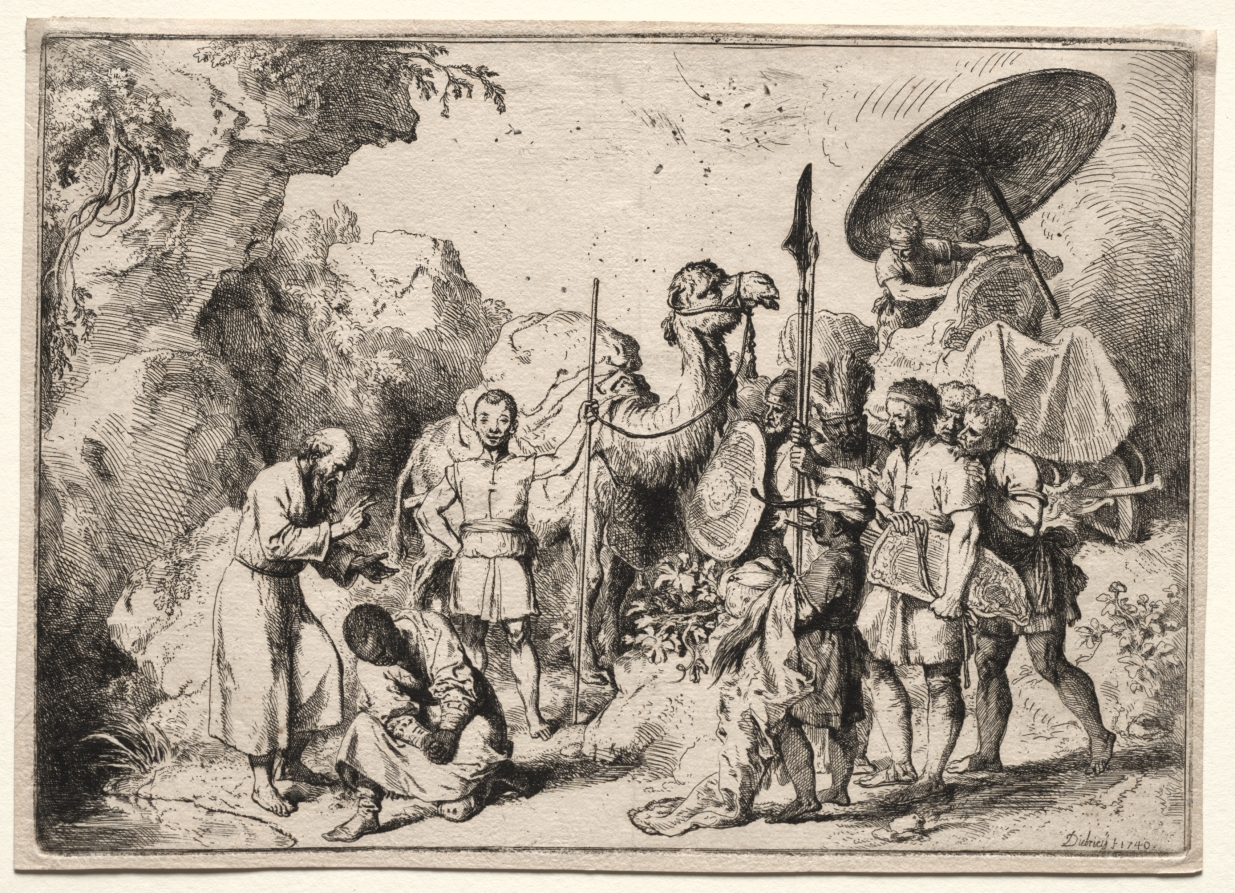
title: Deacon Philip Baptising the Eunich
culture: Germany, 18th century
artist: Christian Wilhelm Ernst Dietrich (German, 1712–1774)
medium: etching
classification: Print